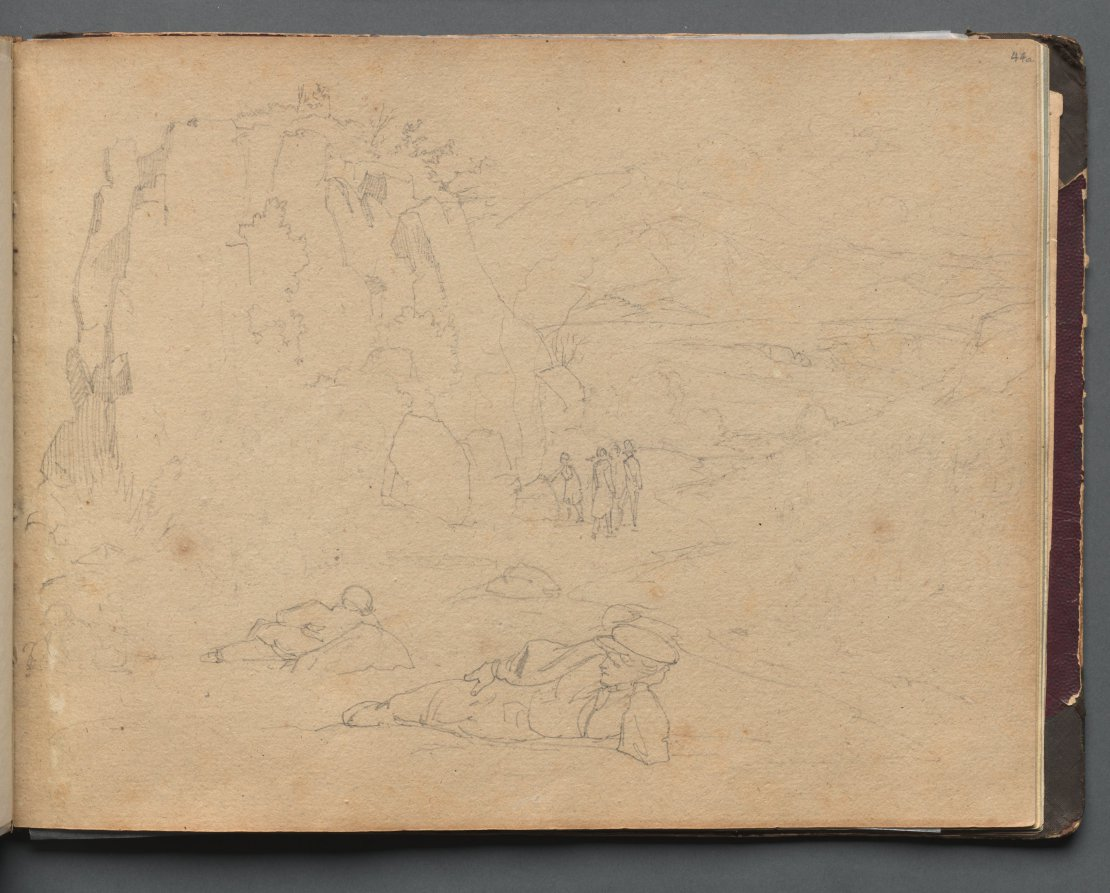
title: Album with Views of Rome and Surroundings, Landscape Studies, page 44a: Figures in a Landscape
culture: Germany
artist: Franz Johann Heinrich Nadorp (German, 1794–1876)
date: c. 1830s-70s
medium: graphite on brown paper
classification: Bound Volume